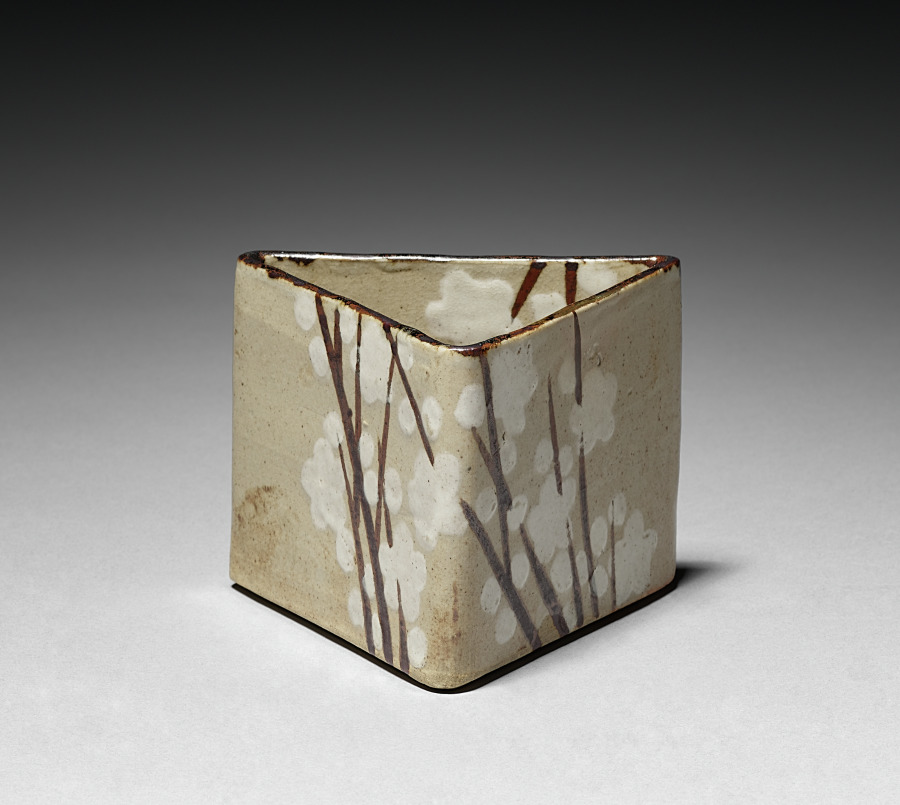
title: One of Five Serving Bowls (Mukozuke) with Prunus Design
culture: Japan, Edo period (1615–1868)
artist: school of Ogata Kenzan (Japanese, 1663–1743)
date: 1700s to mid-1800s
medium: Kyoto Ware: stoneware with underglaze iron oxide and slip decoration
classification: Ceramic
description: Note the rough, tan, clay bodies of these bowls with their deliberate irregularities. The design of branches was first painted in a black iron oxide, then the blossoms and buds in a white slip, followed by the application of a very thin transparent overglaze.